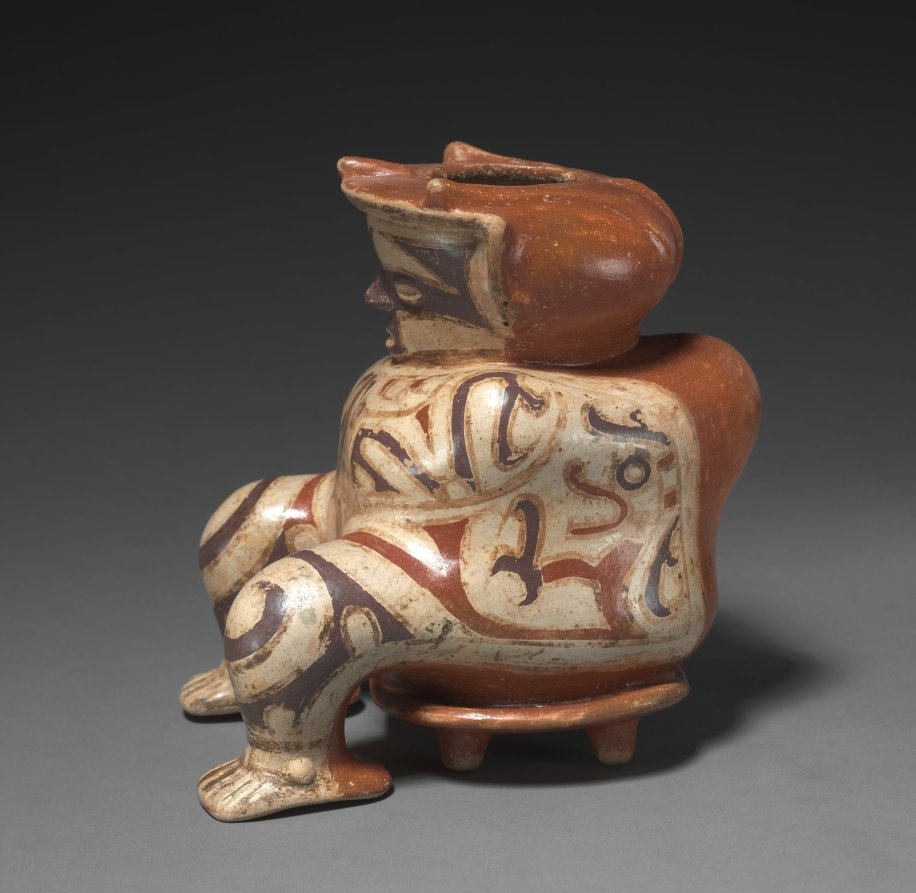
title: Hunchback Seated on a Stool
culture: Central Panama, Conte Style, c. 600-800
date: c. 600–800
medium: earthenware with colored slips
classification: Ceramic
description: The meanings of hunchbacks is not well-studied in Panamanian art. But to the north, in Mexico and Guatemala, such physical anomalies marked individuals of great spiritual power. A few of this figure’s features suggest that hunchbacks held similar status in Panama: The figure sits upon a four-legged stool, a symbol of authority, and the mythic creatures painted on each side may connect the figure to the supernatural realm.